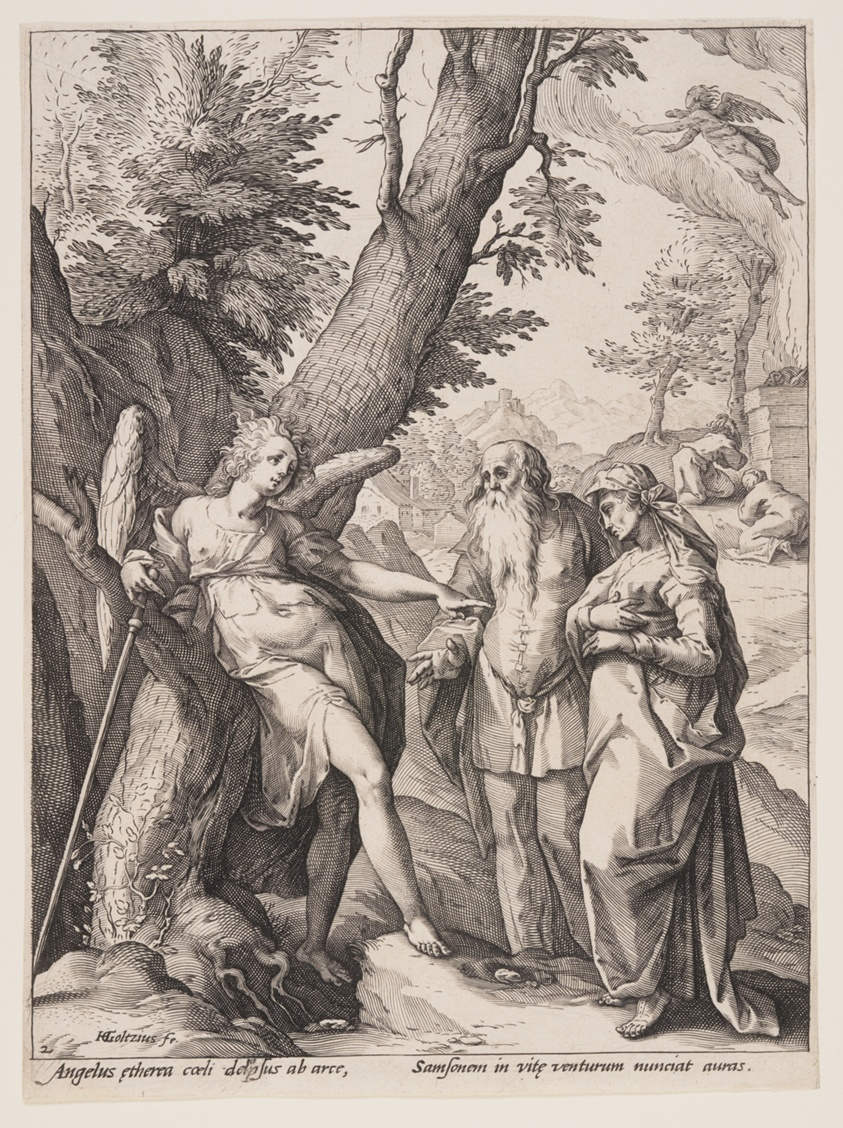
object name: Print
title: Angel with Manoah and His Wife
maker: Hendrick Goltzius (Dutch, 1558–1617)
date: 1586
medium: Engraving on laid paper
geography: Netherlands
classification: engraving; paper; print; prints and drawing